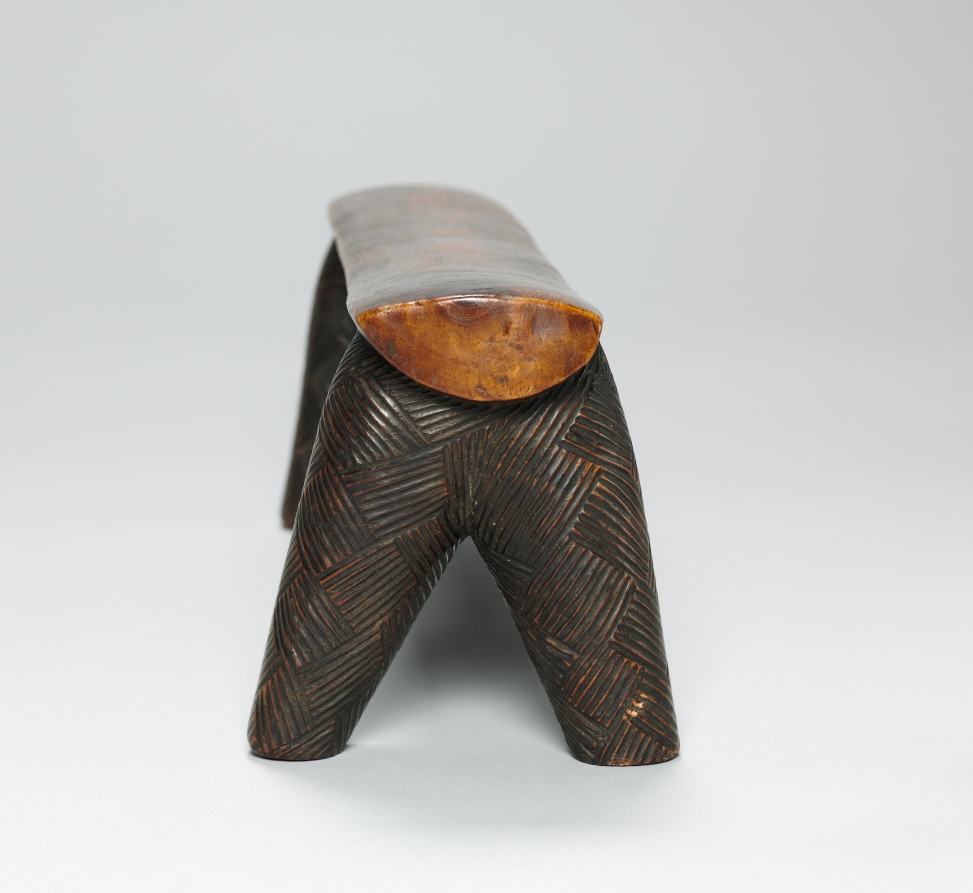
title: Headrest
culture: Africa, Southern Africa, South Africa, Zulu-style carver; Africa, Southern Africa, South Africa, Kingdom of Eswatini, Swazi-style carver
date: 1800s–1900s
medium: Wood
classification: Furniture and woodwork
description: The shape of this four-legged headrest alludes to cattle, whether bull, ox, or cow. This reference services from the fact that these animals are a source of wealth but also act as mediators between the living and the dead. In earlier days, both headrests and cattle were used in dowry transactions.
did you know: Headrests served to protect the elaborate coiffures highly fashionable until the early to mid-20th century and also enhanced contact with the ancestral realm through dreams.